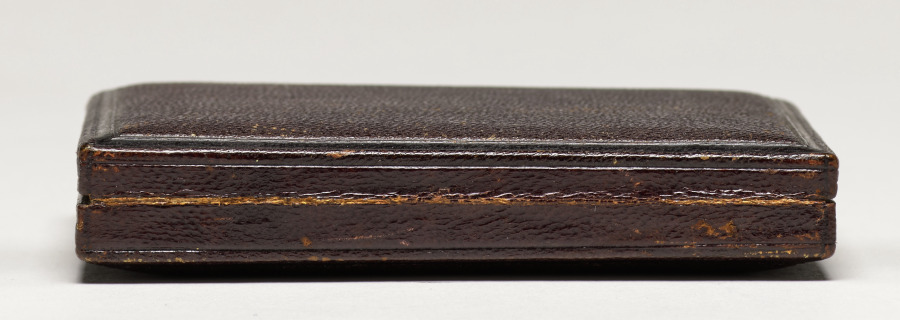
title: Alice Montgomery (1850-1917)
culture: America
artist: Enoch Long (American, 1823–1898)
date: 1850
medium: daguerreotype, applied color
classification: Photograph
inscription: Written in black ink on enclosed paper: "Alice Montgomery / 1850-1917"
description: Children have always been particularly cherished subjects for photography. Portraits were made to preserve the memory of their stages of growth and, in an age when long-distance travel was rare, to share with faraway relatives. And, for a sadder reason: in 1840 an estimated one-third of children died before age five. Photography offered grieving parents the opportunity to immortalize their children’s features. This tragic genre of photographs, later called “post-mortems,” often depicts the children in fine clothing, laying down with eyes shut, as if merely napping.